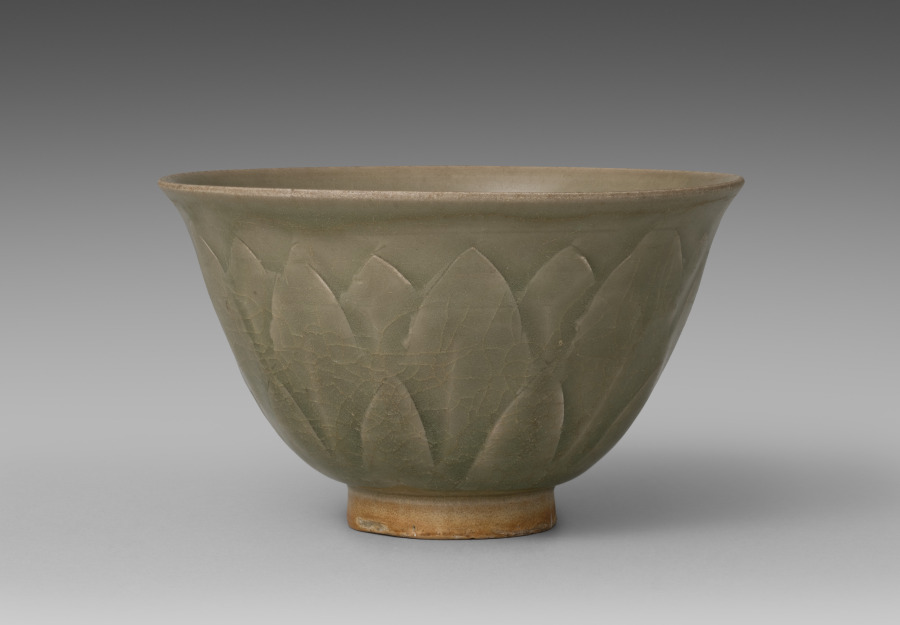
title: Bowl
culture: China, Northern Song dynasty (960–1127)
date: 1000s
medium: glazed stoneware; Northern Celadon ware, Yaozhou type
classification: Ceramic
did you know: Overlapping lotus petals cover the exterior walls of this deep bowl.